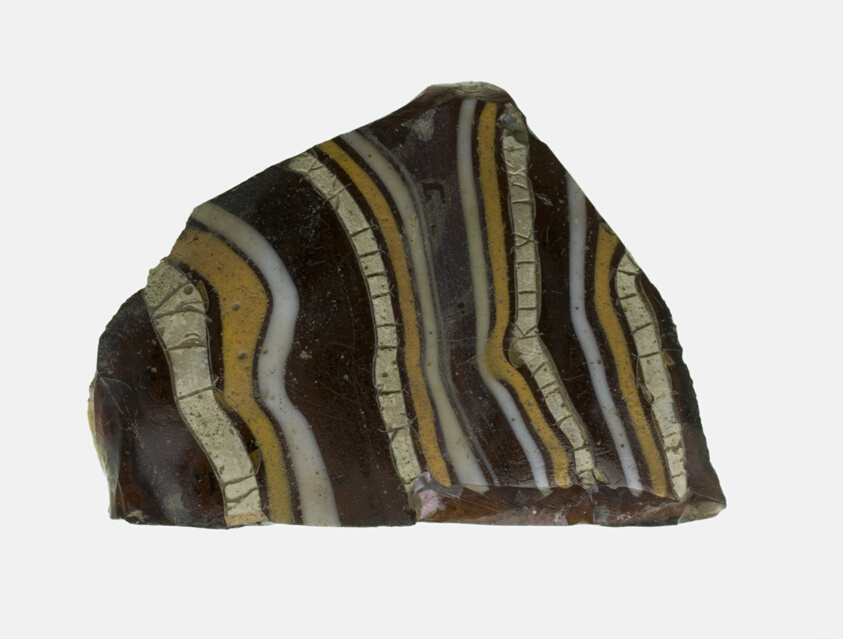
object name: Decorative Arts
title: Fragment of a Bowl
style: roman (ancient, style or period), ancient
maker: Roman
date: 1st century BCE–1st century CE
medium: Glass, mosaic glass technique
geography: Roman Empire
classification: fragment; decorative arts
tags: decoration